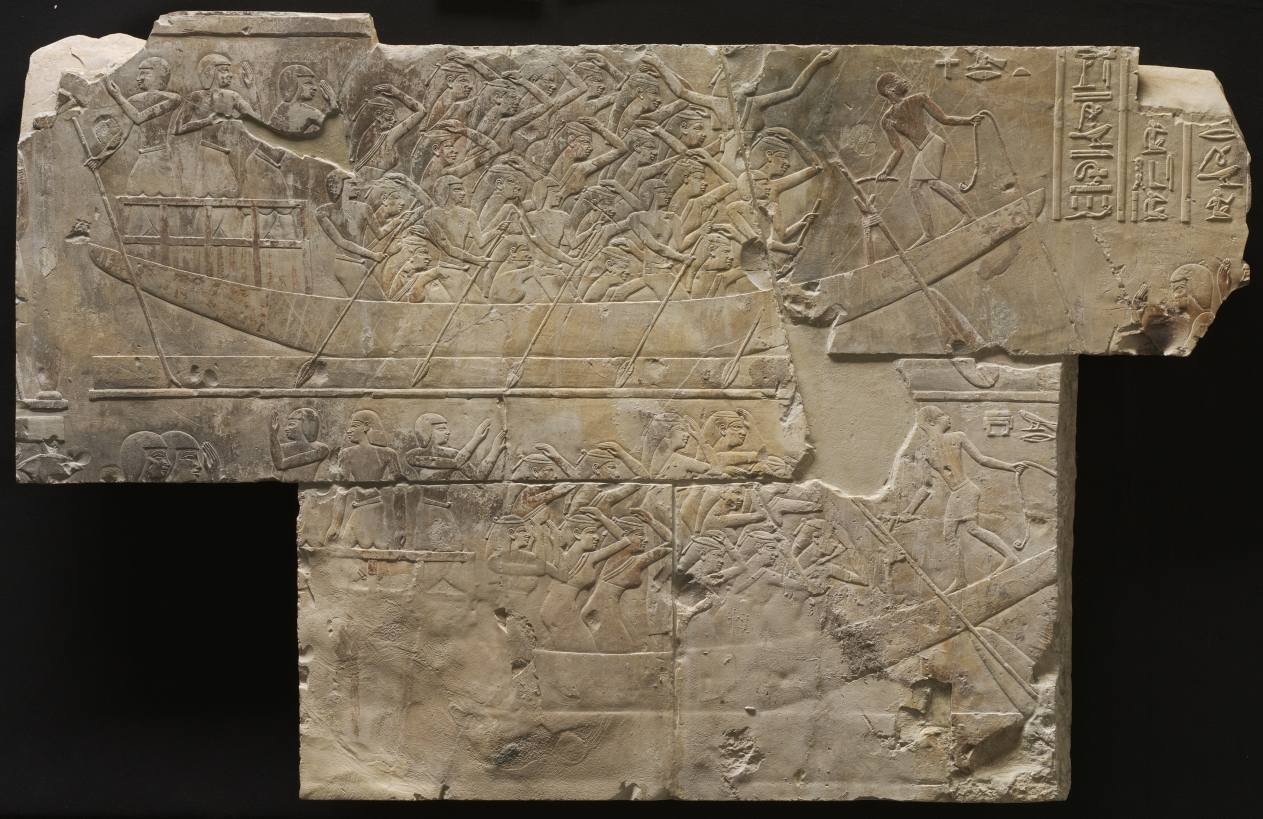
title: Two Boats with Female Mourners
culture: Egypt, Late period (715–332 BCE), Dynasties 25–26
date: c. 667–647 BCE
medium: limestone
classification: Sculpture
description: This relief depicts part of the flotilla accompanying the funerary boat. The setting could be either the brief voyage across the Nile to the cemetery on the west bank or the traditional voyage downstream to Abydos, the sacred city of Osiris, where in earlier times final rites for the dead were performed. Both of the boats preserved here are filled with professional female mourners whose task it was to proclaim the virtues of the deceased and to lament his departure. This composition is certainly copied from a lost, probably painted, original of Dynasty 18.